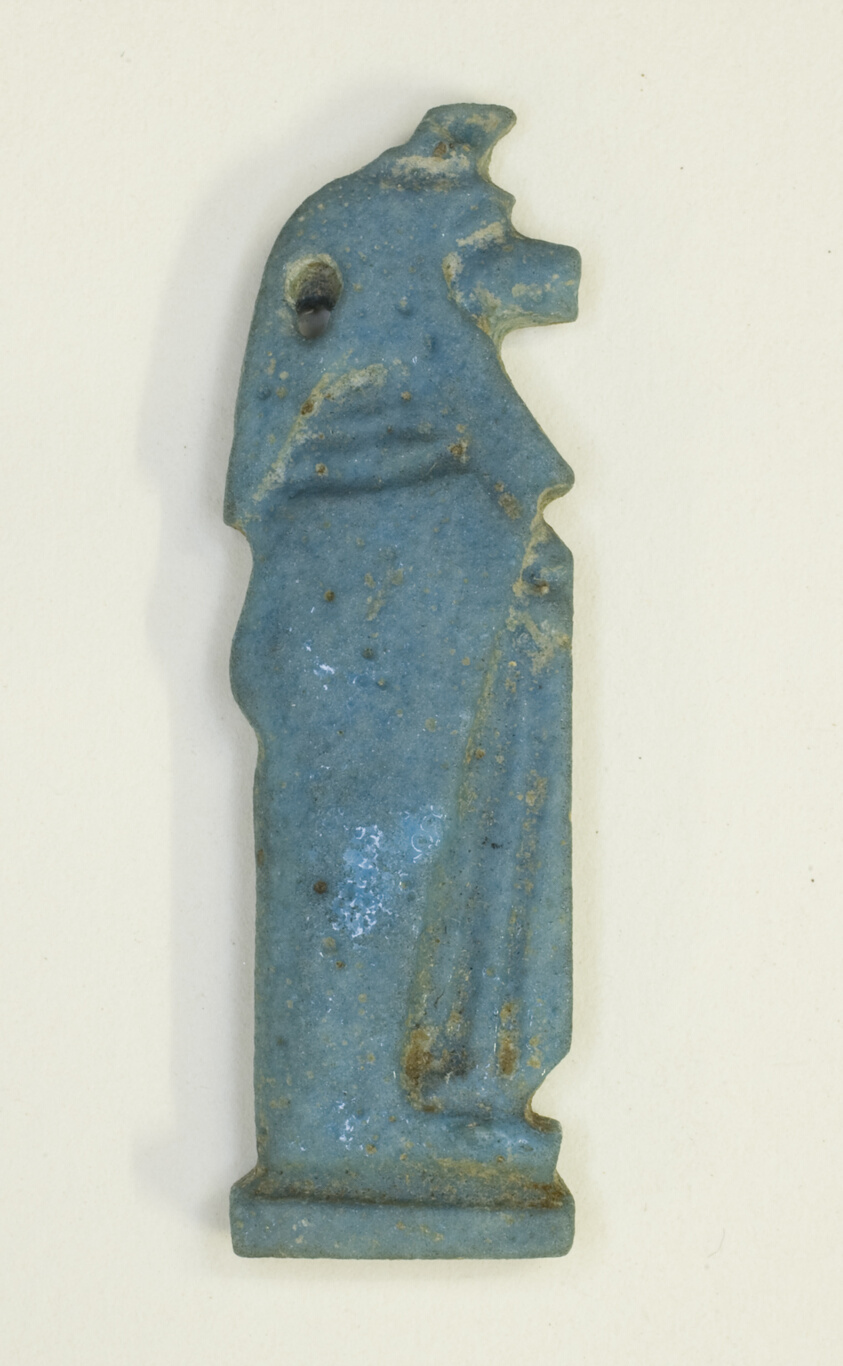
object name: Costume and Accessories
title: Amulet of the God Duamutef (one of the four Sons of Horus)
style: third intermediate period, egyptian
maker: Egyptian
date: Third Intermediate Period, Dynasty 21–25 (1070–656 BCE)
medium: Faience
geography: Egypt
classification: amulet; jewelry; ceramics; ancient art; costume; faïence (composite material)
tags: gods (deities), mummies